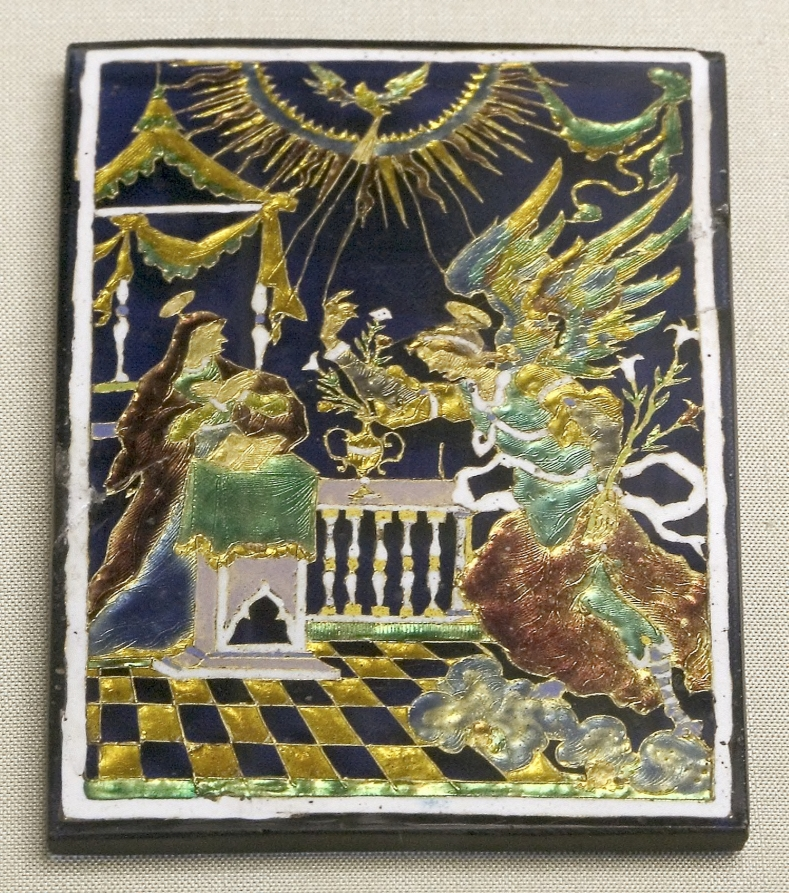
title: The Annunciation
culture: Germany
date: c. 1625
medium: enamel on glass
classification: Glass